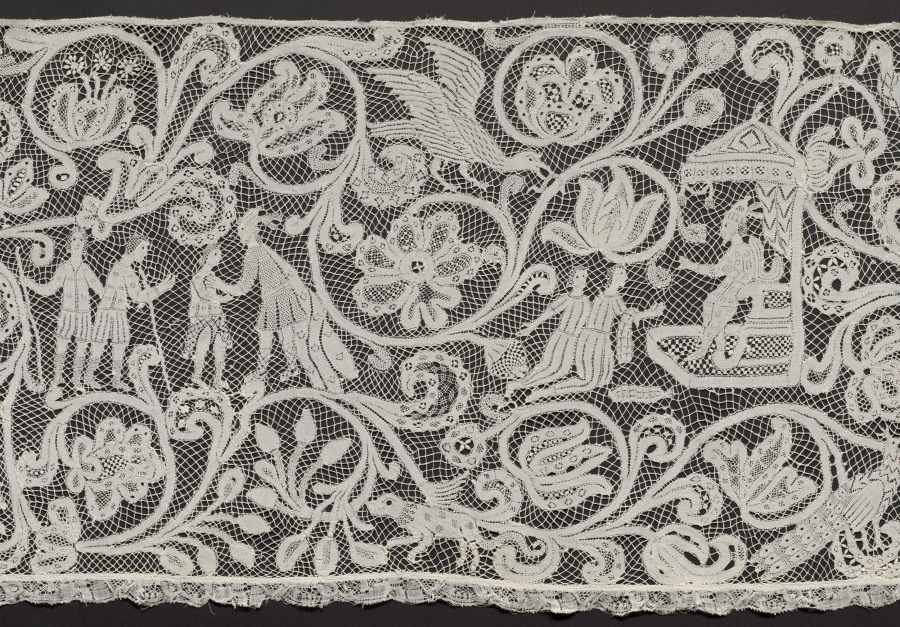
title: Lace Flounce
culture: Italy, Milan(?)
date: 1750–99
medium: Linen: bobbin lace (Punto di Milano)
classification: Lace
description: Being the most prestigious material, lace was used extensively by the 1600s for altar linen and for trimming priest’s albs, often incorporating finely rendered religious images amid blossoming vines. This alb flounce depicts scenes from the Old Testament story of Joseph, whose jealous brothers sold him to a caravan bound for Egypt. Joseph later interpreted dreams of the pharaoh, who made him ruler. When famine in Canaan caused Joseph’s ten brothers to travel to Egypt in search of food, they bowed down to him. After he revealed his identity, he forgave his brothers and God saved the family.